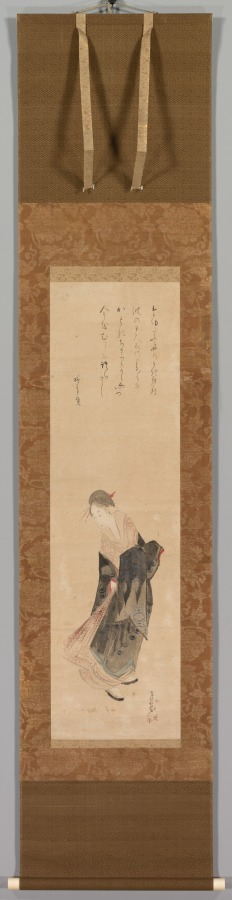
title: Beauty (Bijin)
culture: Japan, Edo period (1615–1868)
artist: Katsushika Hokusai (Japanese, 1760–1849)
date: c. 1775–1849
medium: hanging scroll; ink and color on paper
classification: Painting